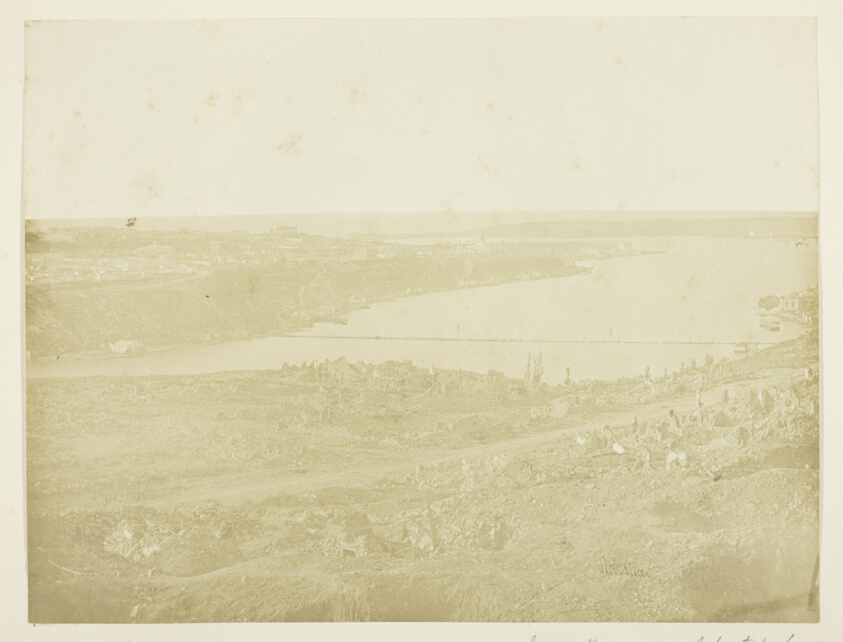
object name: Photograph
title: Inner Harbour of Sebastopol, Bridge Connecting the City with the Suburb Fort Nickolas at the Entrance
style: 19th century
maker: James Robertson (Scottish, c. 1813–d. after 1881)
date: 1855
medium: Albumen print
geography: Scotland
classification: unidentified; photography; photograph